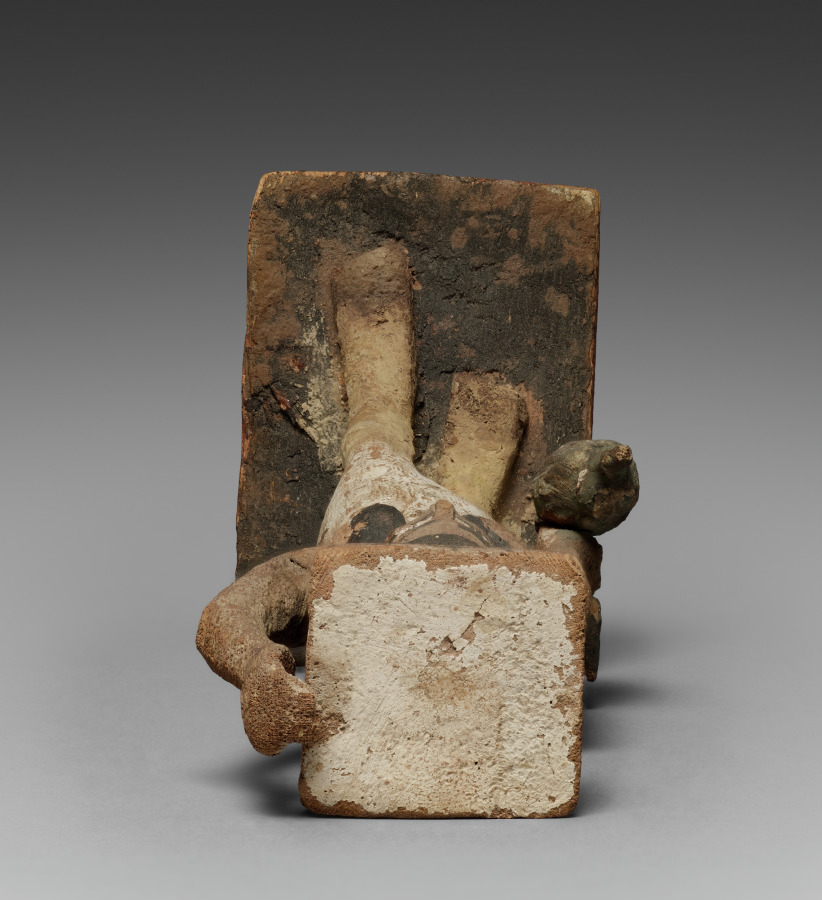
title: Female Offering Bearer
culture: Egypt, Middle Kingdom (2040–1648 BCE), Dynasties 11–12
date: 2000–1801 BCE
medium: painted wood, figure of tamarisk(?), base of sycamore fig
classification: Wood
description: The offering bearer wears a basic wraparound kalasiris dress and a strap that connects to the dress over her left shoulder. It is not known whether straps on ancient Egyptian dresses were designed as a part of the garment or were separate attachments for fashionable or utilitarian purposes. Ancient Egyptian illustrations typically identify women who wore this garment with a strap as servants, whereas artisans depicted men of all socioeconomic levels wearing the version for men.